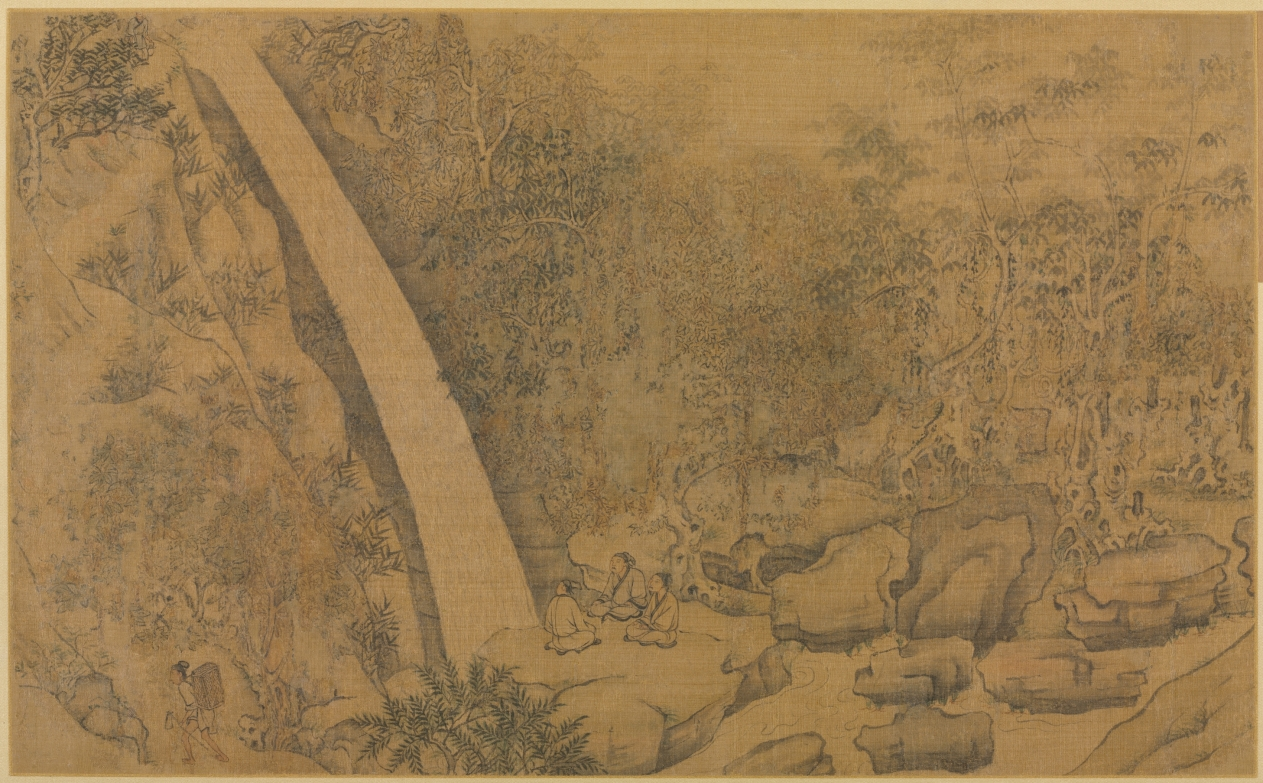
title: Dwelling in the Longmian ("Sleeping Dragon") Mountains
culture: China, Song dynasty (960-1279) - Yuan dynasty (1271-1368)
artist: follower of Li Gonglin (Chinese, c. 1049–1106)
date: 1100s-1200s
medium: handscroll mounted as an album leaf; ink and color on silk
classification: Painting